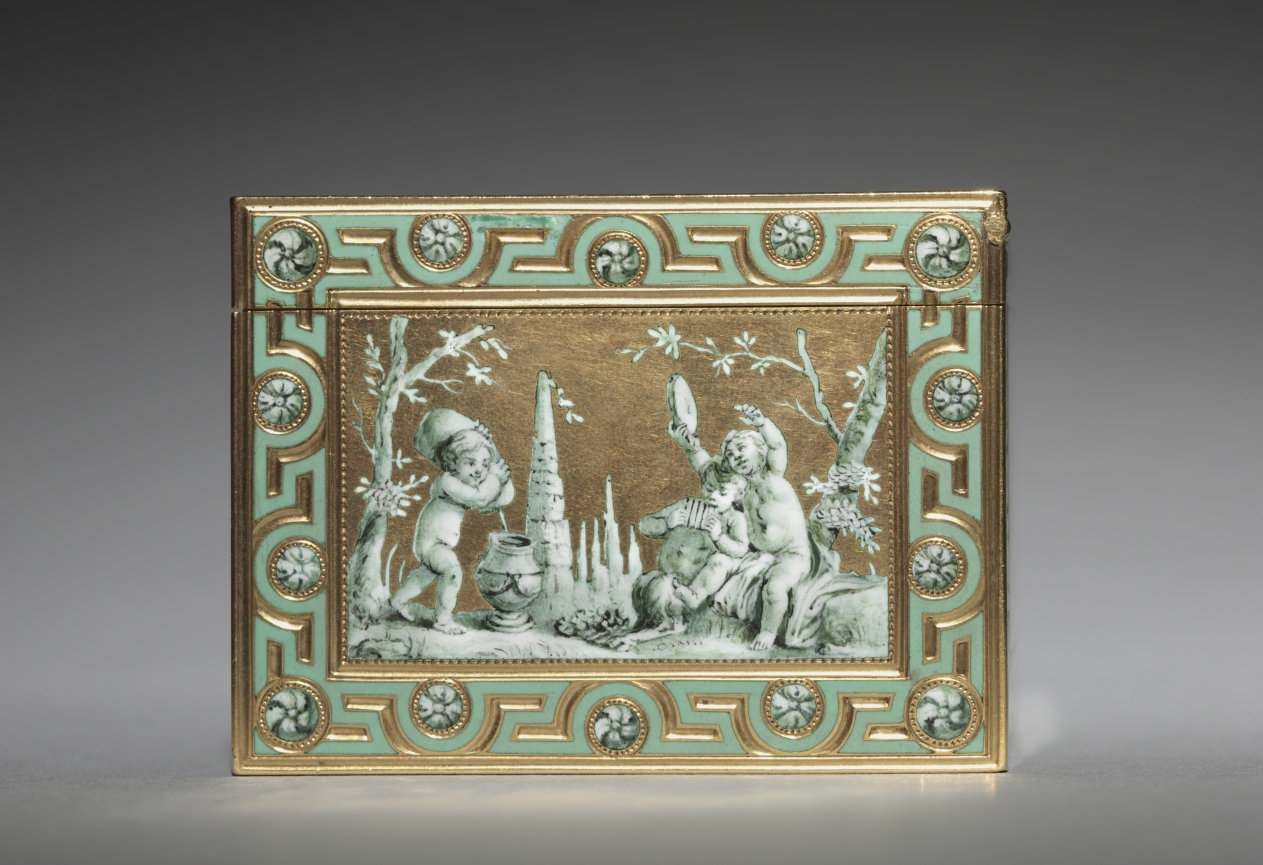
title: Box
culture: France, 18th century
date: c. 1768–1769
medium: gold and enamel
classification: Enamel